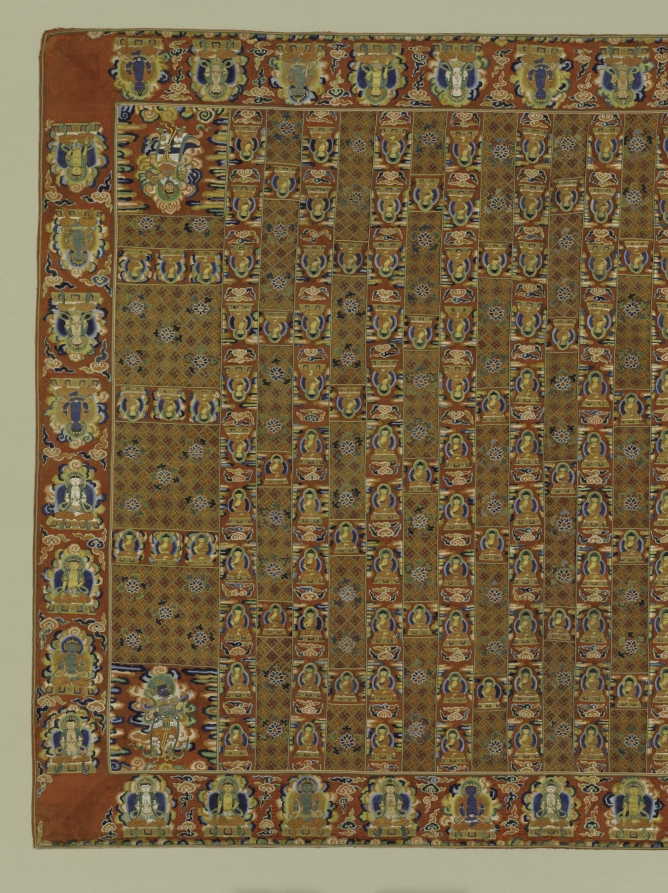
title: Buddhist Priest's Ceremonial Robe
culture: China, Ming dynasty (1368–1644)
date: 1400s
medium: silk and gold thread; embroidery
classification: Garment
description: This example of imperial embroidery is one of the earliest surviving Chinese Buddhist robes (kasaya) in the West. Depicting 991 Buddhas, each slightly different, it is constructed out of patches in reference to the legend in which the Buddha's favorite disciple divided a robe he was given into 30 pieces. Patchwork is also a sign of humility. Multiple Buddha images known as “thousand Buddha” designs are seen painted and sculpted on the walls of cave temples in India, Afghanistan, Central Asia, and China, but are rare on garments. The Four Heavenly Kings, guardians of the four directions, occupy the textile’s corners. When draped around the body, the inverted figures in the upper left corner appear right side up. Robes with 25 columns were worn by the highest-ranking clergy on ceremonial occasions.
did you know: The Five Transcendent Buddhas, who symbolize the purity of the five elements, are repeated around the edges.